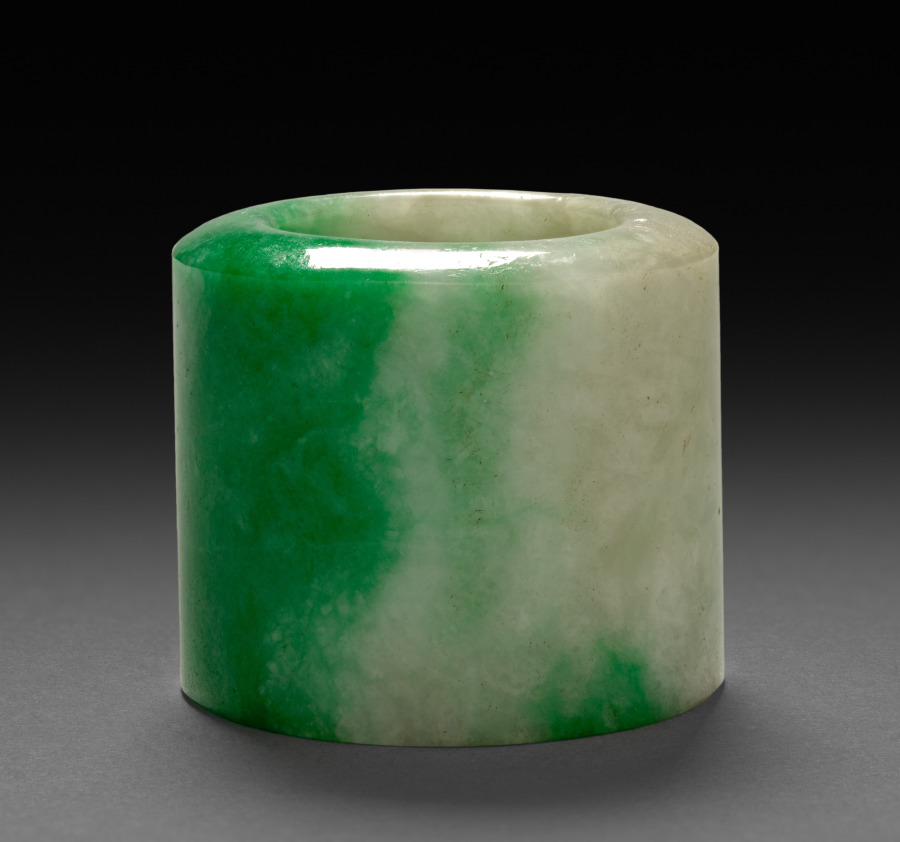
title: Thumb Ring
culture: China, Qing dynasty (1644-1911) or Republican period (1912-49)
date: 1800s–1900s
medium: green and white jade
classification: Jewelry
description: Jade rings were worn by men on the thumb of the right hand to assist with holding and pulling the string of the archer’s bow. However, thumb rings were also fashionable accessories for civil officials in the late Qing dynasty.